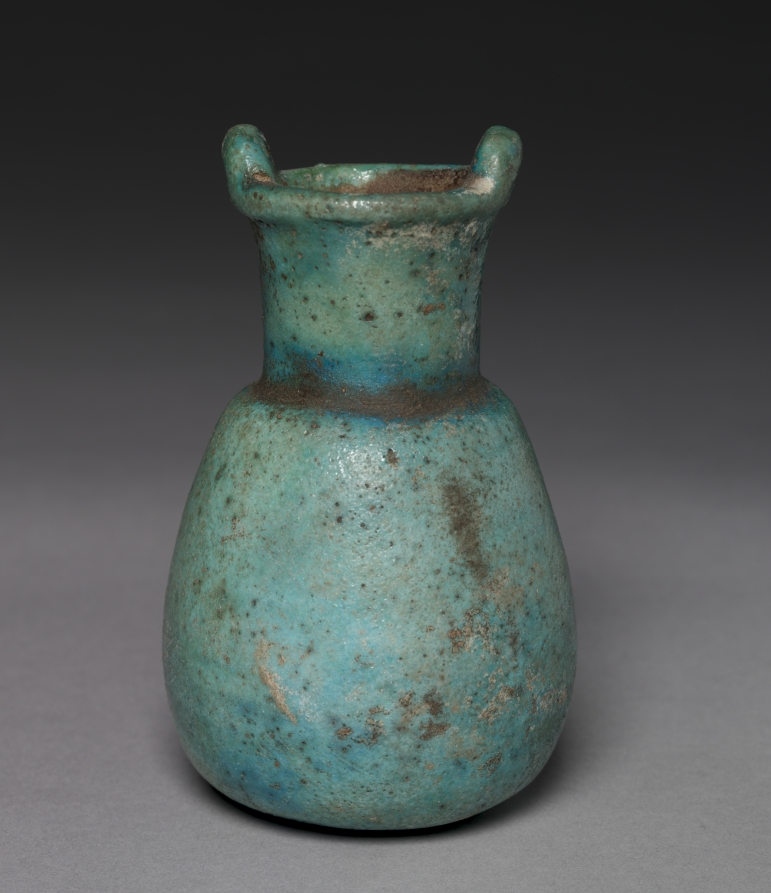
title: Situla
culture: Egypt, Late period (715–332 BCE)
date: 715–332 BCE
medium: turquoise faience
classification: Vessels